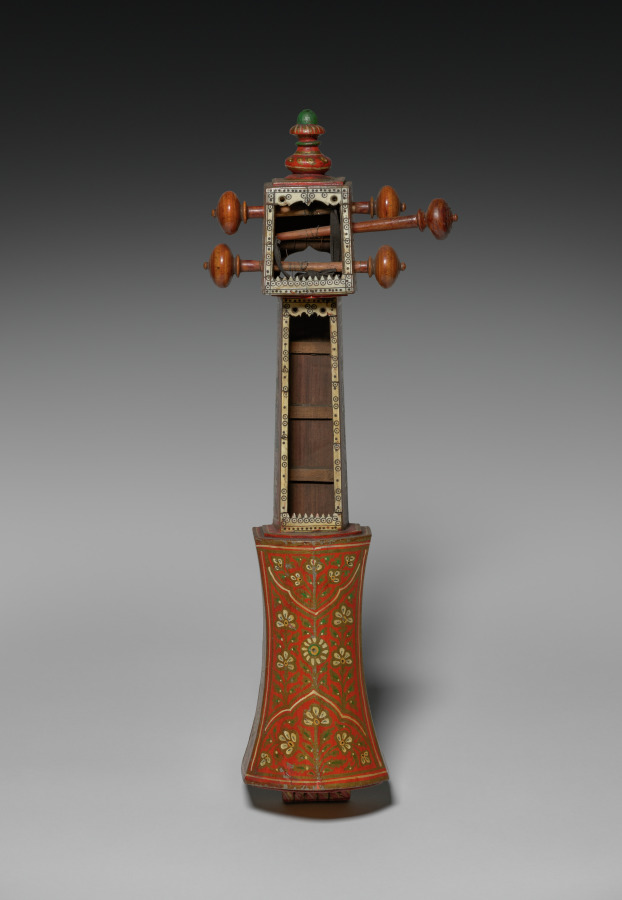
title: Sarangi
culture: India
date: 1800s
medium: Gum tempera and gold on wood with mother-of-pearl and bone or ivory inlays; metal strings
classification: Musical Instrument